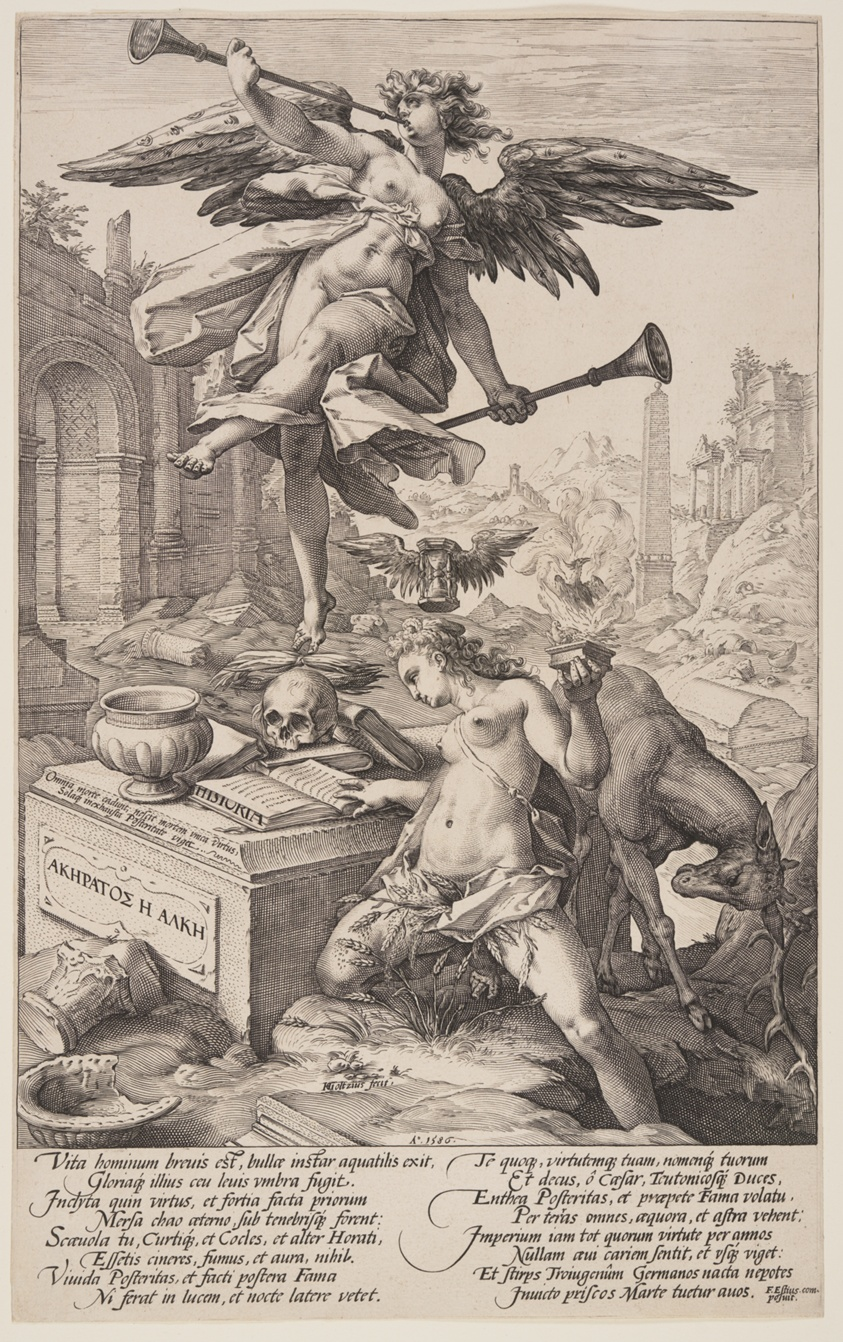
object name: Print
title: Allegory of Fame and History, from The Roman Heroes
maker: Hendrick Goltzius (Dutch, 1558–1617)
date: 1586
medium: Engraving on ivory laid paper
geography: Netherlands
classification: print; paper; prints and drawing; engraving